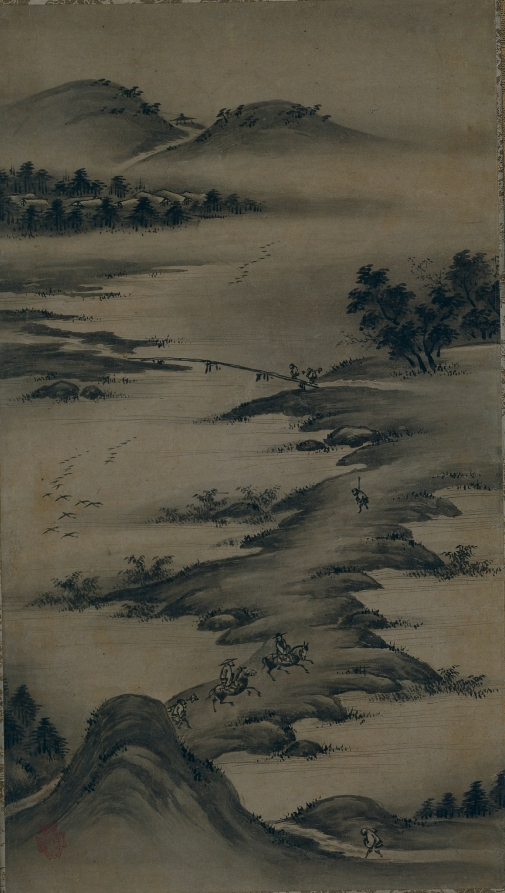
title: Seasonal Landscapes: Summer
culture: Japan, Muromachi period (1392–1573)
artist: Kano Hideyori (Japanese, active mid- to late 1500s)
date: mid- to late 1500s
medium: hanging scroll, ink on paper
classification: Painting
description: Now comprising three scrolls, this composition was originally a set of four paintings depicting the seasons. The set is among the most important of the artist’s surviving works. Each painting was executed in the gyō mode, indicating a speedy brush with rounded strokes. The terms shin (formal), sō (cursive), and gyō (semicursive), borrowed from calligraphy terminology, are terms commonly used by connoisseurs to describe brushwork in ink paintings.